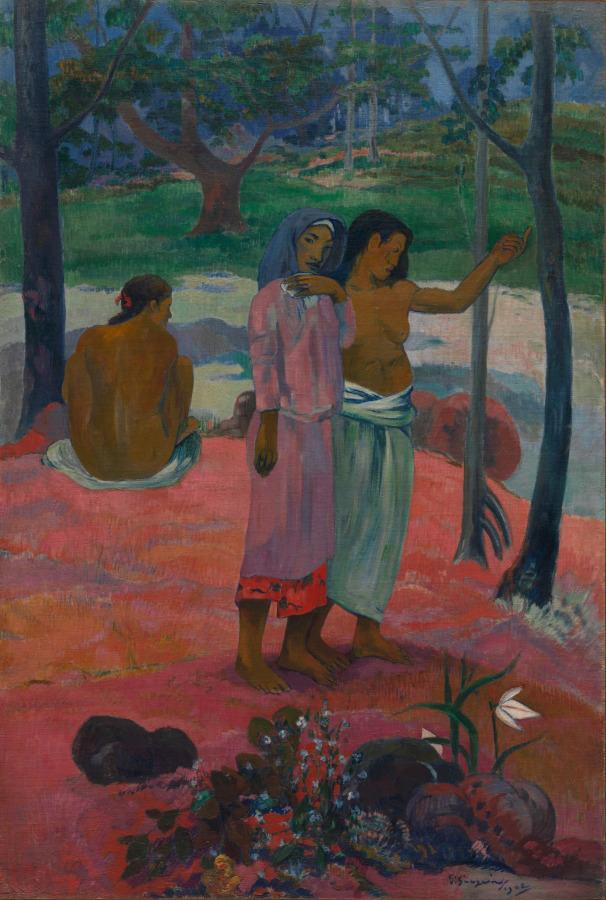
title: The Call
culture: France, late 19th-early 20th Century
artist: Paul Gauguin (French, 1848–1903)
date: 1902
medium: oil on fabric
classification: Painting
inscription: Signed lower right: P. Gauguin / 1902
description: Painted on a remote island in Polynesia a year before the artist's death, The Call belongs to a series of late works that explore the mysteries of life and death. Two women stand with bare feet, as if on sacred ground. One woman gestures to someone outside the picture, perhaps responding to a "call" from fate or destiny. Gauguin realized his ambition of painting from memory and the imagination through such mysterious, dreamlike images.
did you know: Although known as one of the founders of modern art, Gauguin found inspiration in ancient Greek, Roman, and Egyptian art. The woman with the pointing finger on the right side of this painting was taken from a figure on the Parthenon frieze.